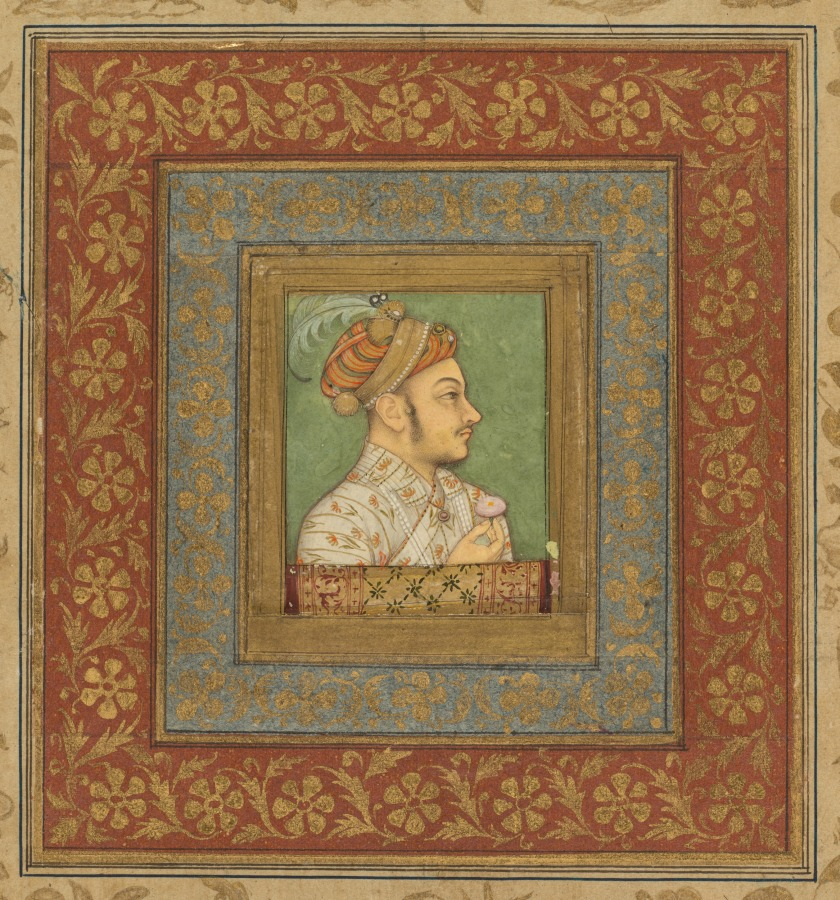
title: Portrait of Murad Bakhsh (1624–61)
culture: Mughal India, court of Shah Jahan (reigned 1628–58)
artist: attributed to Balchand (Indian, active 1595–c. 1650)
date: c. 1635; borders c. 1700s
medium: gum tempera and gold on paper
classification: Painting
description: The miniature portrait of a Mughal prince is now mounted on an album page. Originally, it was in a gemstone setting as a “portrait jewel” to be worn by family and supporters at court. India’s ruling elite had been wearing portrait jewels since Sir Thomas Rowe (about 1581–1655) presented British portrait miniatures and cameos to the Mughal emperor as part of a diplomatic gift in 1616, when he successfully negotiated for British access to India’s ports.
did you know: This portrait belonged to a cousin of Sir Winston Churchill.